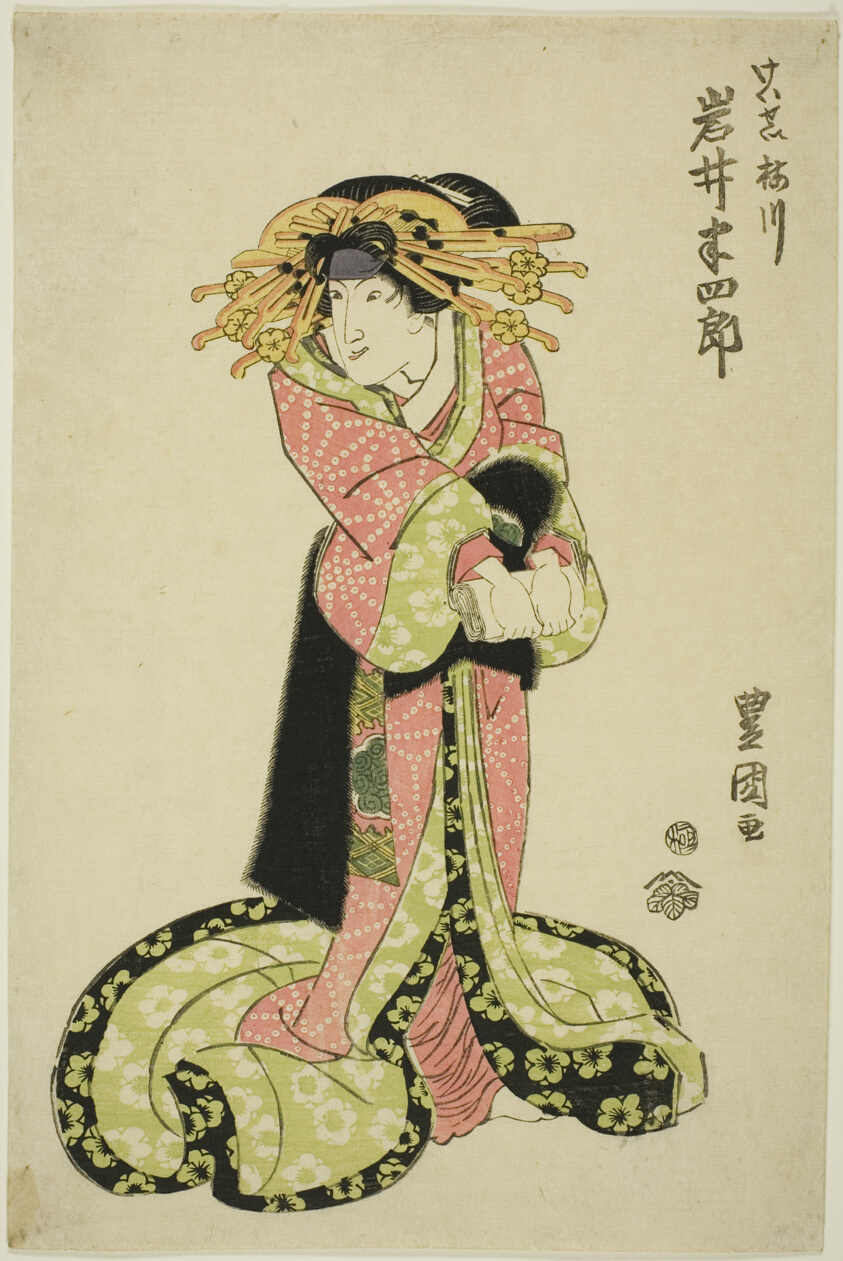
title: The actor Iwai Hanshiro as a courtesan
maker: Utagawa Toyokuni I 初代 歌川 豊国; Japanese, 1769–1825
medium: Color woodblock print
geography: Japan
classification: print; asian art